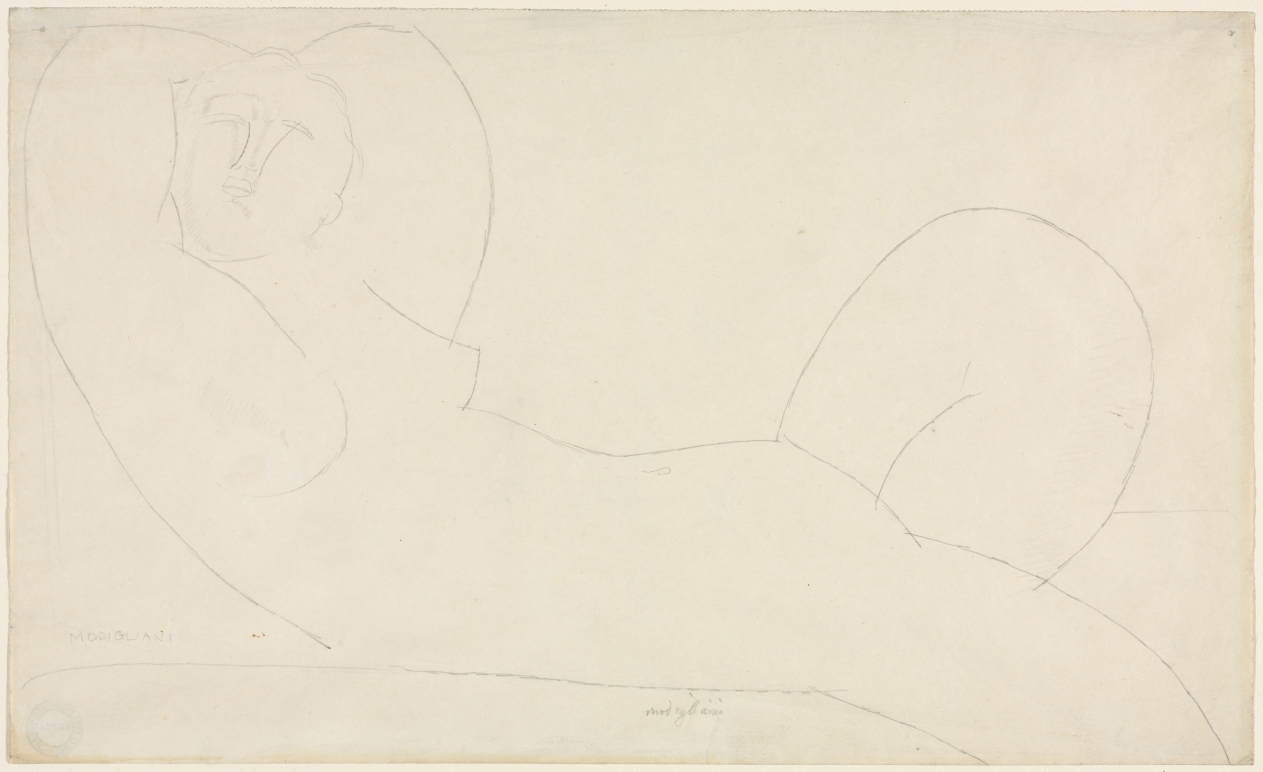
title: Reclining Female Nude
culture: Italy, 20th century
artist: Amedeo Modigliani (Italian, 1884–1920)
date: 1914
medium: graphite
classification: Drawing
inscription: signed, lower left, in graphite: MODIGLIANI ; signed, lower center, in graphite: modigliani ; VERSO, upper right, in graphite: 25583 [upside down] ; center, stamped in purple ink: PHOTO [sideways] ; FRAGMENT OF OLD MOUNT (now removed), in top half, (printed label): [illegible] [GA]LLE[RIE]S / [illegible]80 FIFTH AVENUE / BETWEEN 53RD AND 54TH STREETS / NEW YORK / ESTABLISHED 1885 ; across center, in black typescript: "Nude" [underlined] / Drawing by / Amadeo Modigliani ; center left, in brown ink on a sticker: 245[illegible][9?] / [rew?] ; in bottom half, in blue crayon: 25583 ; FRAGMENT OF OLD MOUNT(now removed), upper right, (printed label): 1929 ; upper left (printed) N° ; across center, in brown ink: 25583 / Modigliani / Nu bra levés / A.V. [all crossed out with two blue lines] ; bottom right, in graphite: X ; FRAGMENT OF OLD MOUNT (now removed), upper left, (printed label): N° ; across center, in brown ink: 25583 / Modigliani / nu bras levés [all crossed out with two pink lines] ; bottom left, in orange crayon: 3000 [underlined]